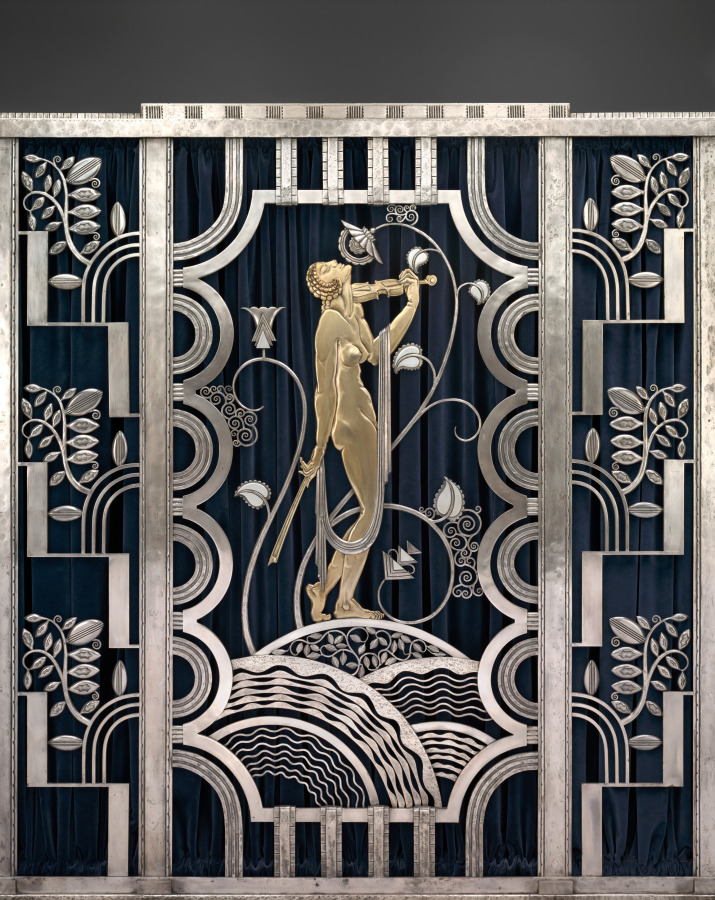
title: Muse with Violin Screen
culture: America, Ohio, Cleveland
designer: Paul Fehér (American, born Hungary, 1898–1990)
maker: Rose Iron Works (America, Ohio, Cleveland, est. 1904)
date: 1930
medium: Steel, brass; silver and gold plating, cotton velveteen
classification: Metalwork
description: Since the early years of the 20th century, the Rose Iron Works, a Cleveland supplier of architectural ornament, has produced distinguished metalwork. The company’s founder, Martin Rose, was born in Austria-Hungary and studied ornamental metalsmithing in Vienna prior to immigrating to Cleveland in 1902. In the 1920s, he hired a talented young Parisian designer, Paul Fehér, to work for the firm. Fehér’s designs, culminating in this massive screen, brought a modern European sensibility to the Rose Iron Works production. With its geometric patterning, highly stylized and abstracted natural forms, and the central figure reminiscent of the celebrated jazz singer Josephine Baker, this screen reflects the classic motifs of Art Deco design.